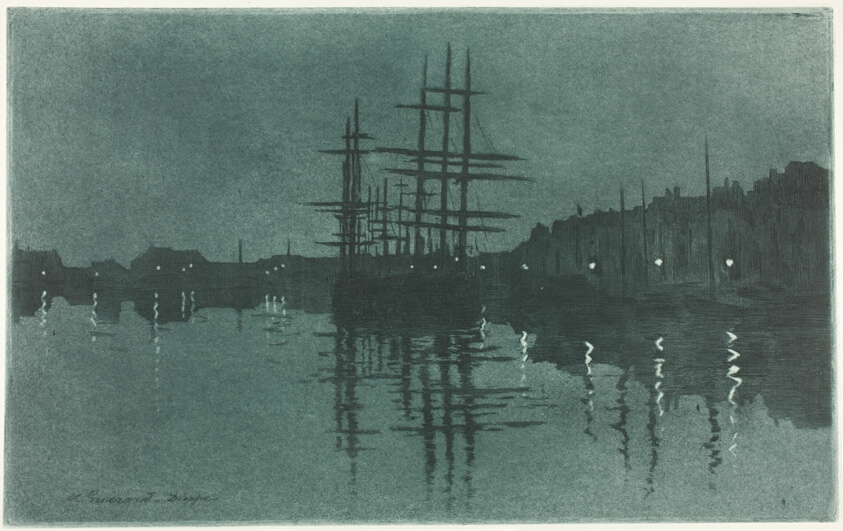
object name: Print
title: The Basin at Dieppe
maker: Henri Charles Guérard (French, 1846-1897)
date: 1883/89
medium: Etching and aquatint with burnishing in black and blue-gray ink on ivory laid paper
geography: France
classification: print; prints and drawing